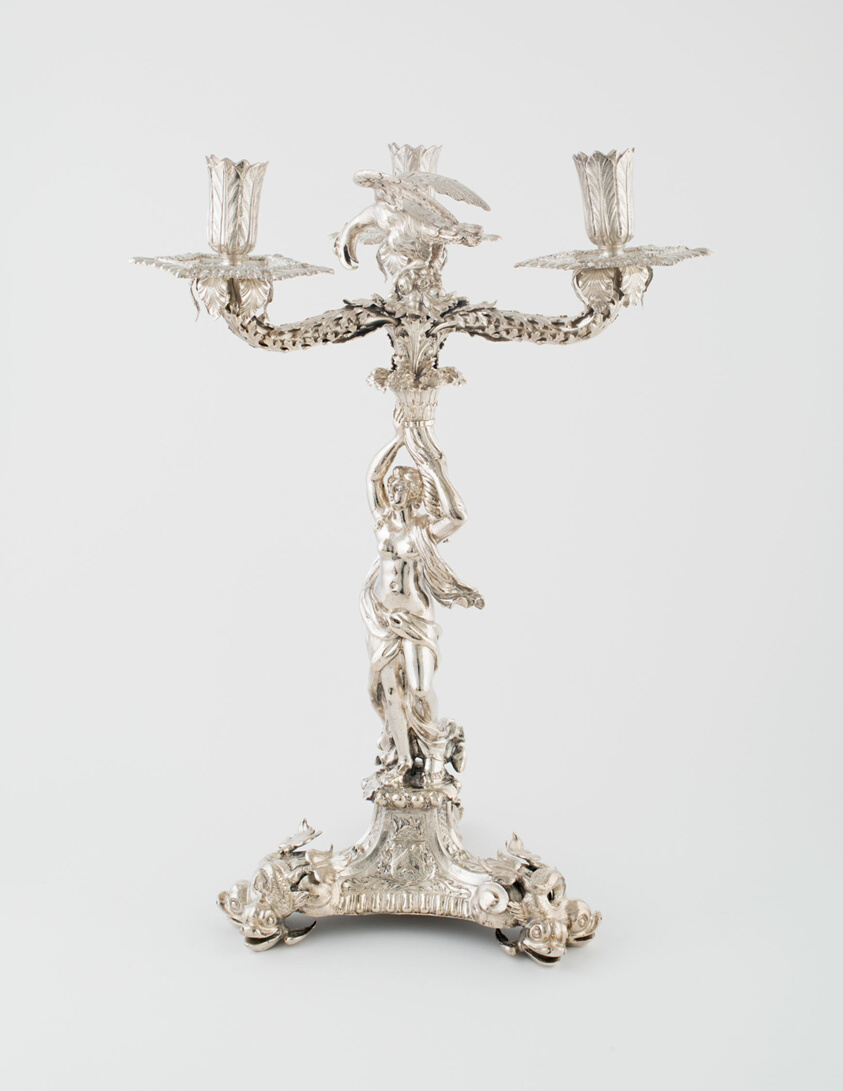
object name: Metalwork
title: Tripod Candelabrum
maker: Probably London, England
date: c. 1680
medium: Silver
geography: London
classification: candleholder - candelabra; candleholder; silver; metalwork; european decorative arts